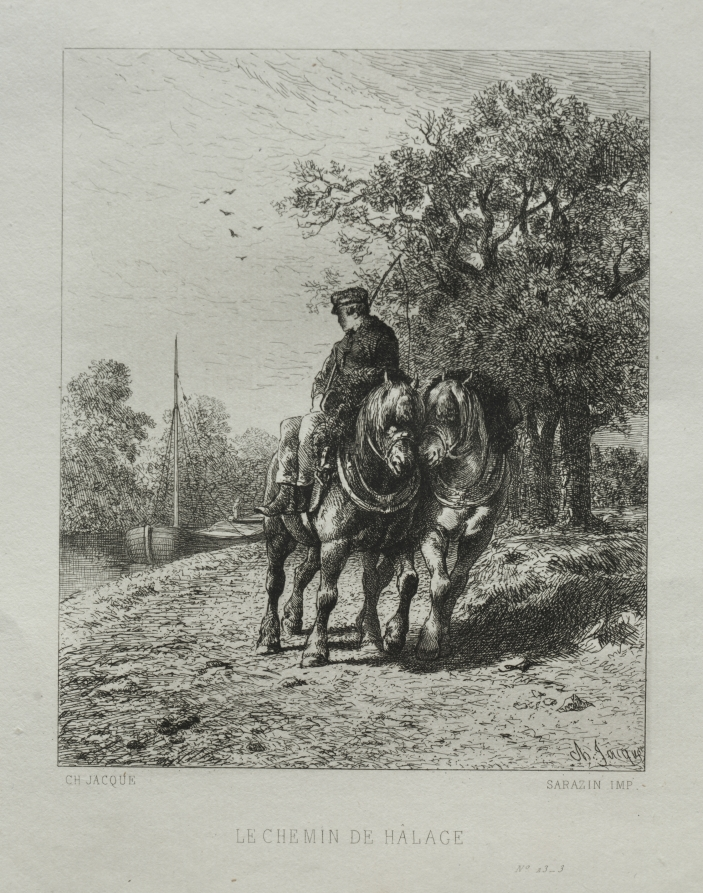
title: The Tow Path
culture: France, 19th century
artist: Charles-Émile Jacque (French, 1813–1894)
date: 1864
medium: etching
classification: Print